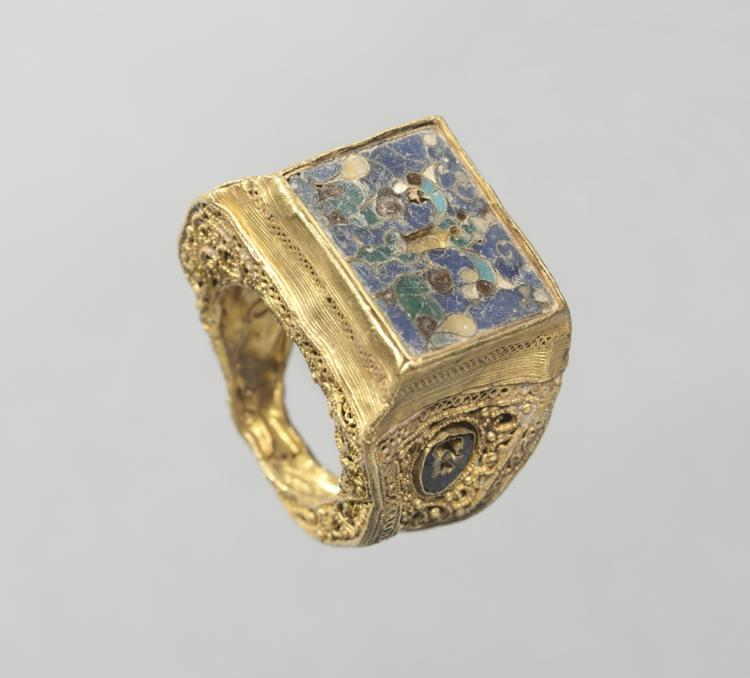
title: Ring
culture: Byzantium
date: 800s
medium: gold, filigree and cloisonné enamel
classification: Jewelry